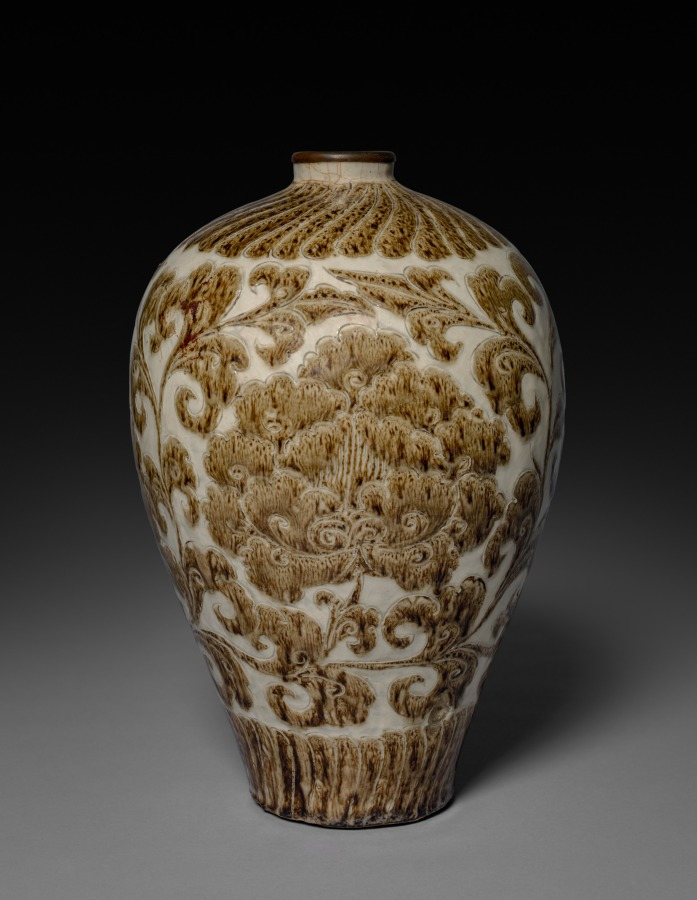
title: Meiping Vase: Cizhou Ware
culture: China, Northern Song dynasty (960-1127)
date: 1100s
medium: Buff stoneware with carved underglaze slip decoration, Cizhou ware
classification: Ceramic